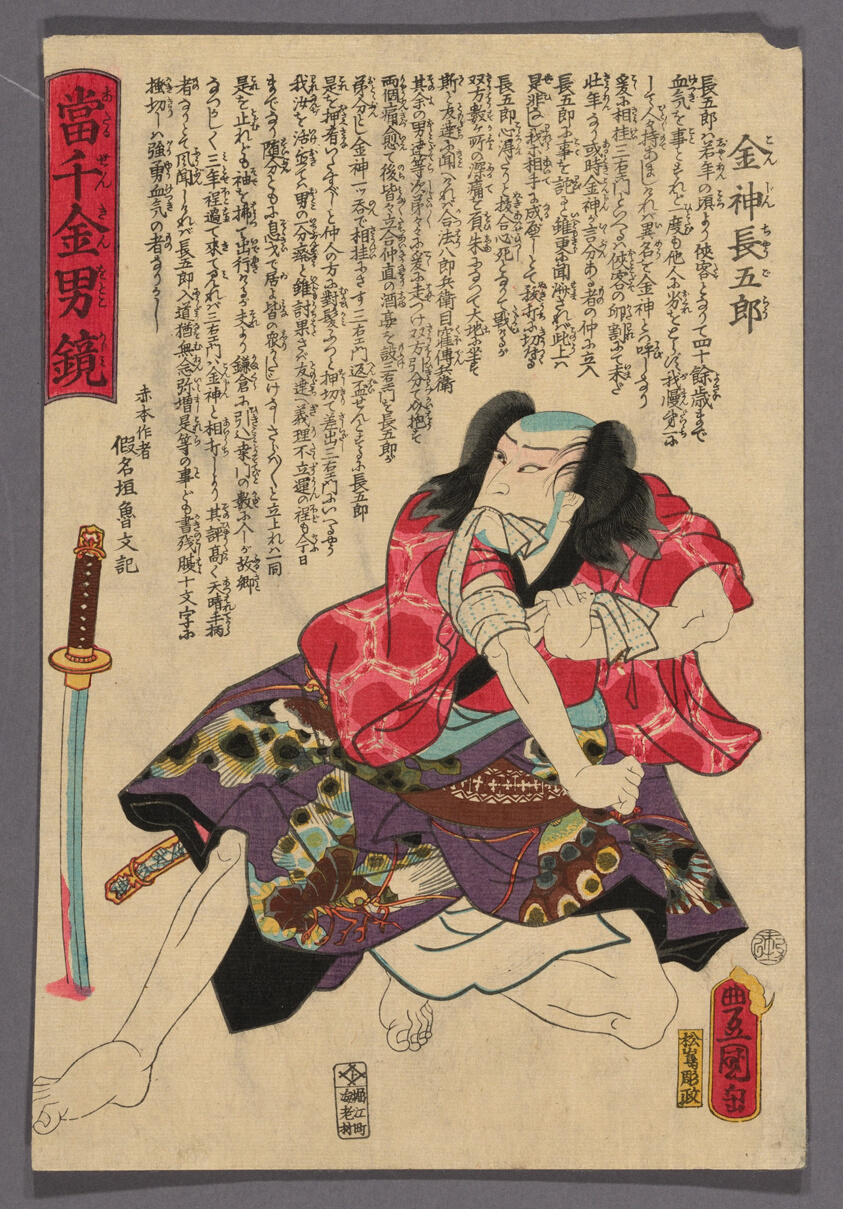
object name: Print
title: The Actor Kataoka Nizaemon VIII as Konjin Chogoro, from the series "Atari senkin otoko kagami"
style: Japanese (culture or style)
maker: Utagawa Kunisada I (Toyokuni III) (Japanese, 1786–1864)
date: 1859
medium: Color woodblock print; oban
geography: Japan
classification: woodblock print; print; asian art